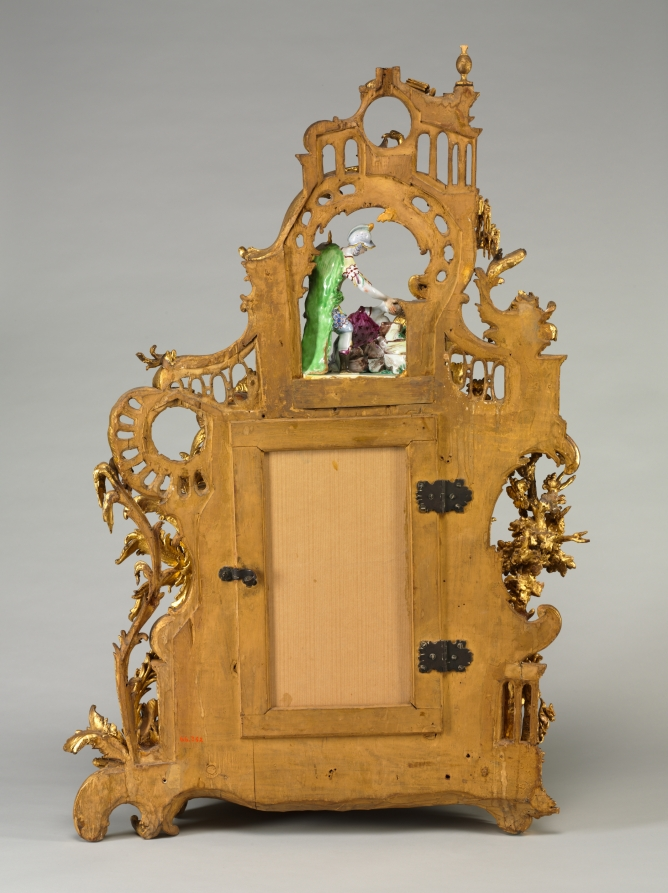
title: Clock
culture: Germany, 18th century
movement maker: Baumgartinger (German)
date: c. 1750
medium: carved and gilded wood, faience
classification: Furniture and woodwork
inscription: inscribed on face: Baumgartnger [sic] Mergentheim.